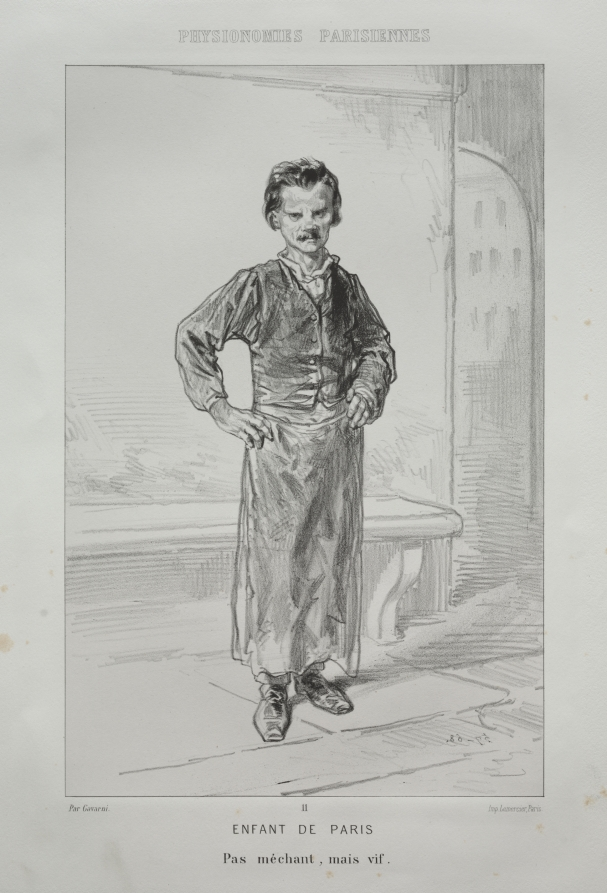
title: Enfant de Paris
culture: France, 19th century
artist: Paul Gavarni (French, 1804–1866)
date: c. 1857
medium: lithograph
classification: Print